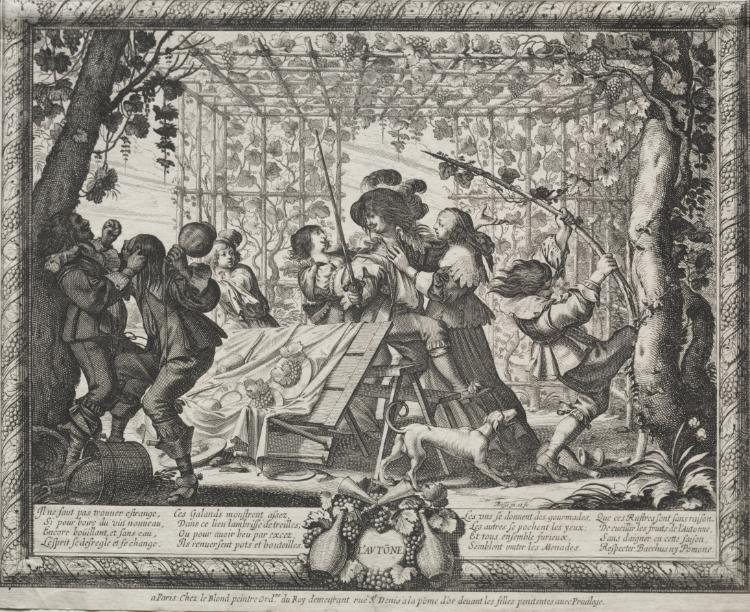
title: The Four Seasons: Autumn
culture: France, 17th century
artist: Abraham Bosse (French, 1602–1676)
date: 1635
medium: engraving and etching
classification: Print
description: Depictions of the four seasons in the early modern period often emphasized timeless agrarian seasonal activities. In this image of autumn, however, Abraham Bosse portrayed instead a group of middle-class people in contemporary costume. The men and women appear not as laborers bringing in the crops, but as drinkers sampling the harvest. As urban dwellers invading a rural space, they make a mess of it, overturning the table, drawing the sword, and tussling in the shadows—all indicators of taking too much liberty with the “new wine” (du vin nouveau).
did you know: Like the figures in this composition, Bosse himself had little interest in following the rules. In 1661, he was expelled from the French Royal Academy of Painting and Sculpture due to his controversial teachings.